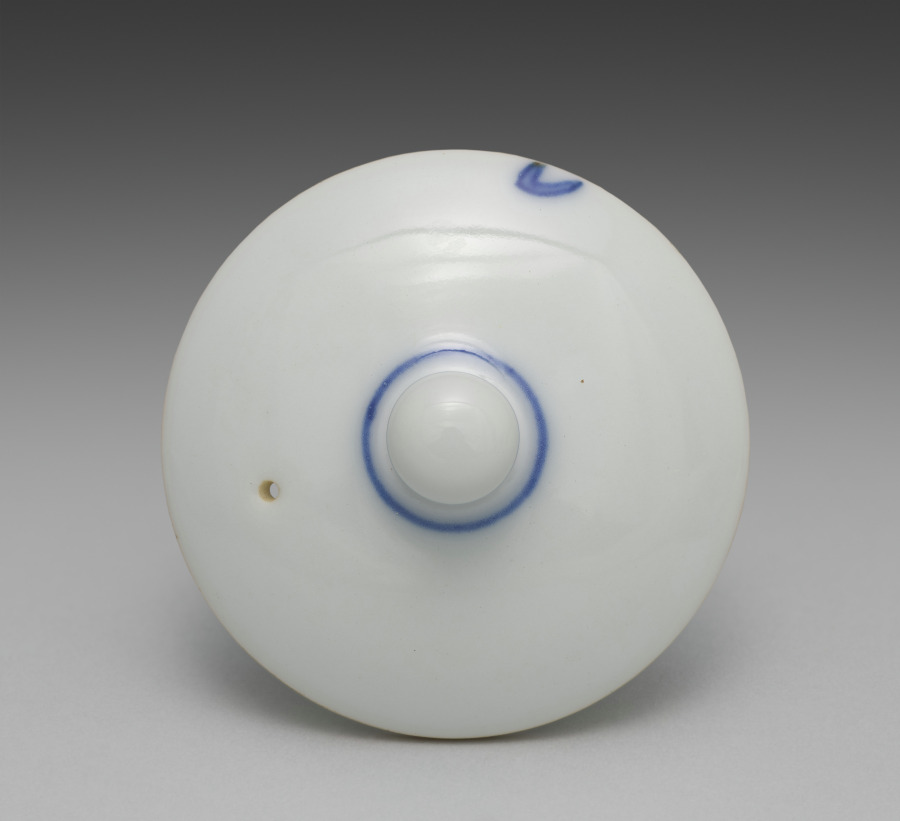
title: Lid for a Teapot from Tea Set with Orchids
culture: Japan, Meiji period (1868–1912)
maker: Seifū Yohei III (Japanese, 1851–1914)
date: c. 1893–1914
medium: Porcelain with underglaze blue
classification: Ceramic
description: Although the teapot here is stored in a separate box from the five cups, these six pieces may once have been part of a tea set that included other tools such as a water cooler. The teacups have orchid flowers on both sides in underglaze blue, as well as a blue band inside the footring. The teapot has the same design and a blue band painted around the bottom of the lid’s knob. The cups’ long wood storage box is stamped on the exterior, over the lid and base, with a small red seal reading “Satō.” The same seal appears on five small squares of yellow textile, one placed in the bottom of each compartment in the teacup storage box. These are additional to the customary yellow cloths stamped with a “Seifu” seal. Interestingly, four of the Seifū cloths are stamped with an ovoid seal, while the remaining cloth, which is a slightly lighter color, has an unusual seal that is not quite gourd-shaped and with the fū of Seifū in a stylized, unrecognizable form. The teapot has its own box with a Satō seal and is wrapped with an orange textile stamped with the same unusual Seifū seal. A set with a very similar surface design is in the Brooklyn Museum. The Brooklyn set has a water cooler and a small pitcher, in addition to the teapot and cups, and all are in a single storage box. This box records the tea tools as made with kanpakuji, or “bright-jewel white porcelain,” counted among Yohei III’s most important inventions, and carved images. In fact, both sets have a white surface much closer in coloration to the cool white of porcelain clay used in Kyoto at the time, and the designs are simply painted. The Brooklyn set was thus likely mismatched at some point with a box intended for another tea set. Nonetheless, the box may have helped prevent the set’s original components from being dispersed, and the set itself provides insight into how the other tools from the present set may have looked.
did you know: This tea set with orchids has a side-handled pot called a kyūsu, used for steeping, straining, and serving tea.